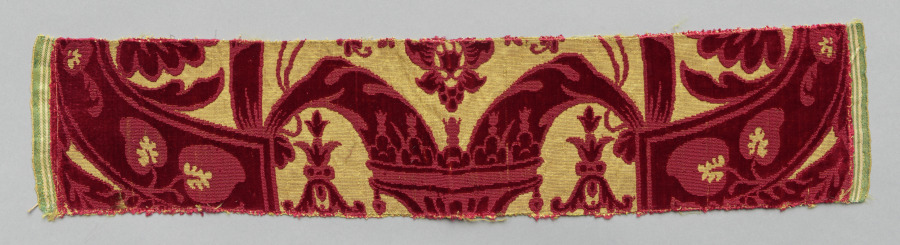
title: Velvet Fragment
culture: Italy, Genoa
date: 1600s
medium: velvet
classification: Velvet